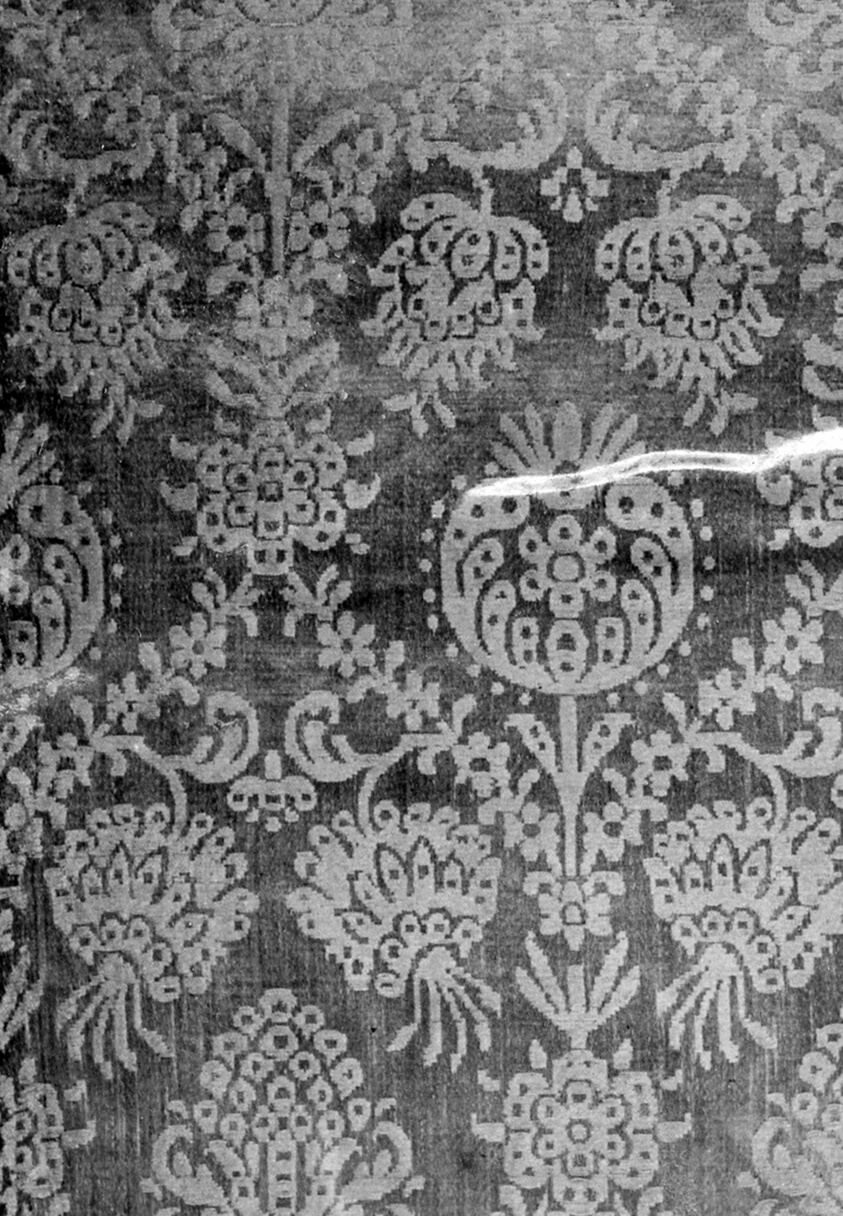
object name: Textile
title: Fragment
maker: Netherlands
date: 17th century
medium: Silk, satin damask weave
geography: Netherlands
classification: textile; weaving